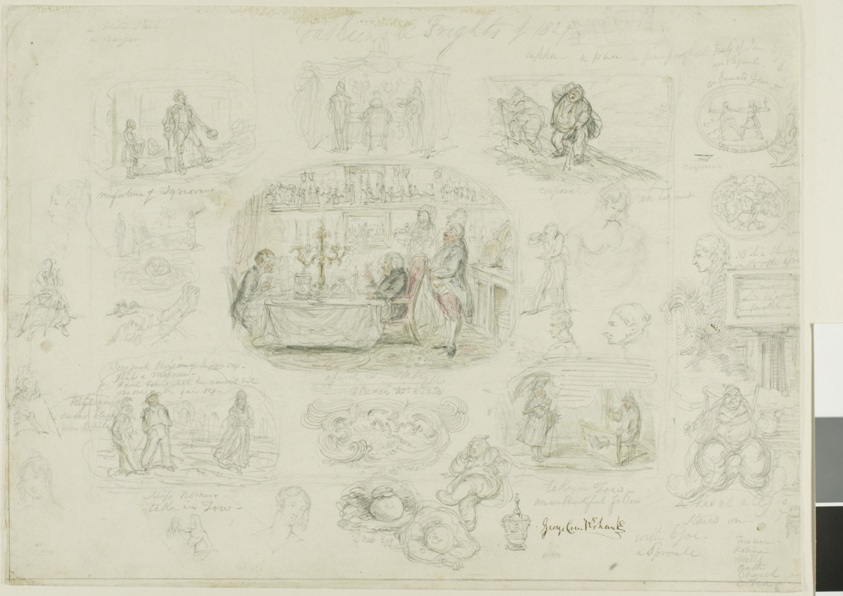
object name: Drawing and Watercolor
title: Fashions and Frights of 1829 (recto); Angels Ever Bright and Fair (verso)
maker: George Cruikshank (English, 1792-1878)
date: 1829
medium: Graphite with brush and watercolor (recto) and graphite (verso) on ivory wove paper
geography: England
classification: graphite; drawings (visual works); prints and drawing